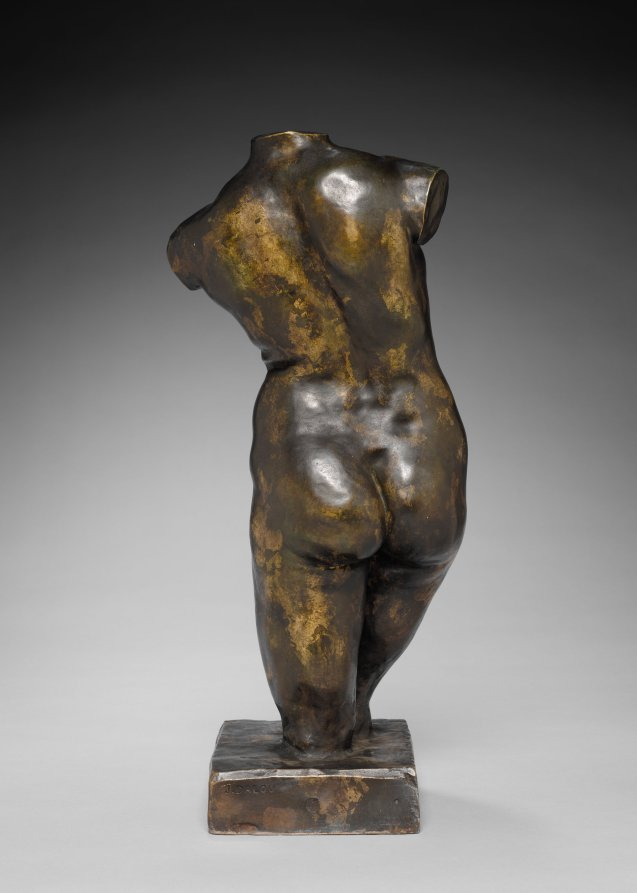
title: Torso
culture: France, 19th century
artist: Jules Dalou (French, 1838–1902)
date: c. 1850 – 1899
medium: bronze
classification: Sculpture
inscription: Signed: "J. Dalou"; "Susse Fres. Ed[ts] Paris"